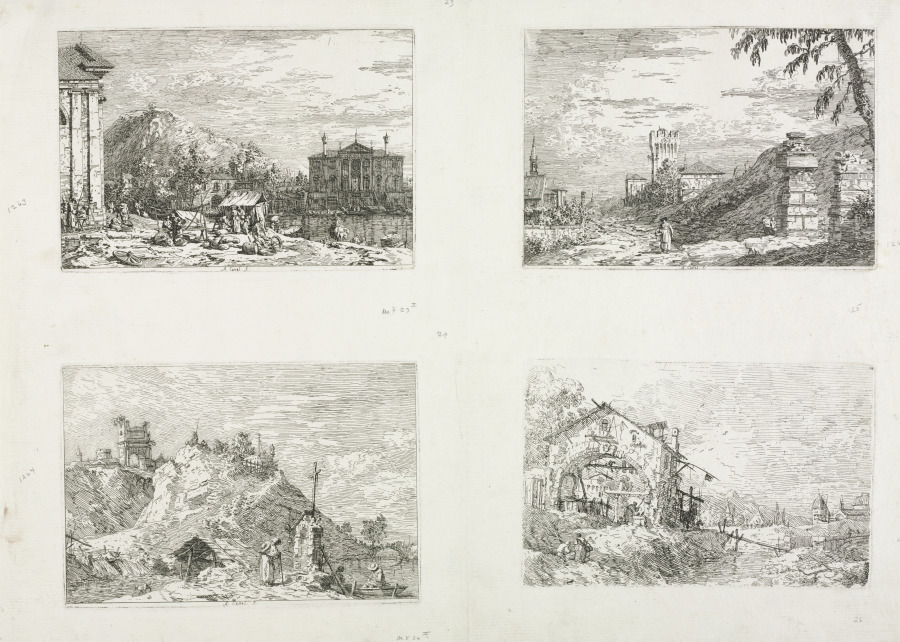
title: Views: Two Ruined Pillars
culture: Italy, Venice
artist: Antonio Canaletto (Italian, 1697–1768)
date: 1735–1746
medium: etching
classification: Print